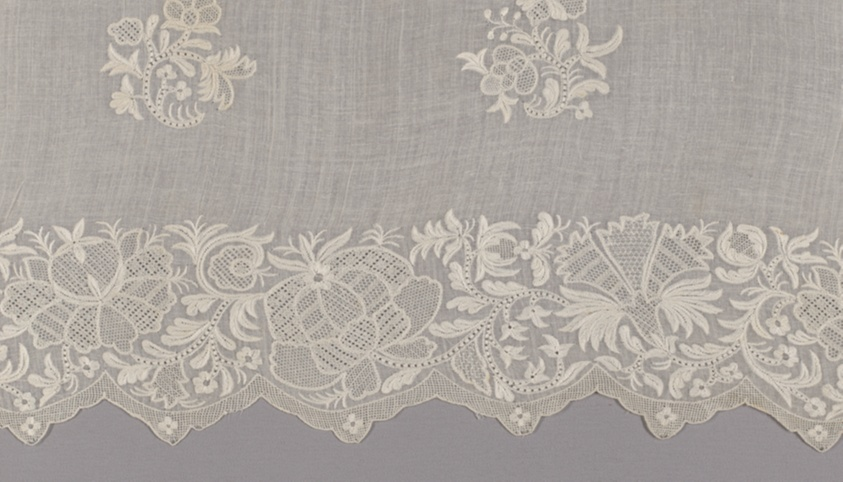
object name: Costume and Accessories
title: Apron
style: 18th Century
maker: England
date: 1760s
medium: Cotton, plain weave; drawnwork and embroidery in cotton, satin, buttonhole, chain, and double chain stitches with linen thread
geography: England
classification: textile; costume accessory; needlework (visual works); costume; dress (garment); clothing; apron (main garment); costume - embroidery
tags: flowers, floral patterns, floral, floral motifs